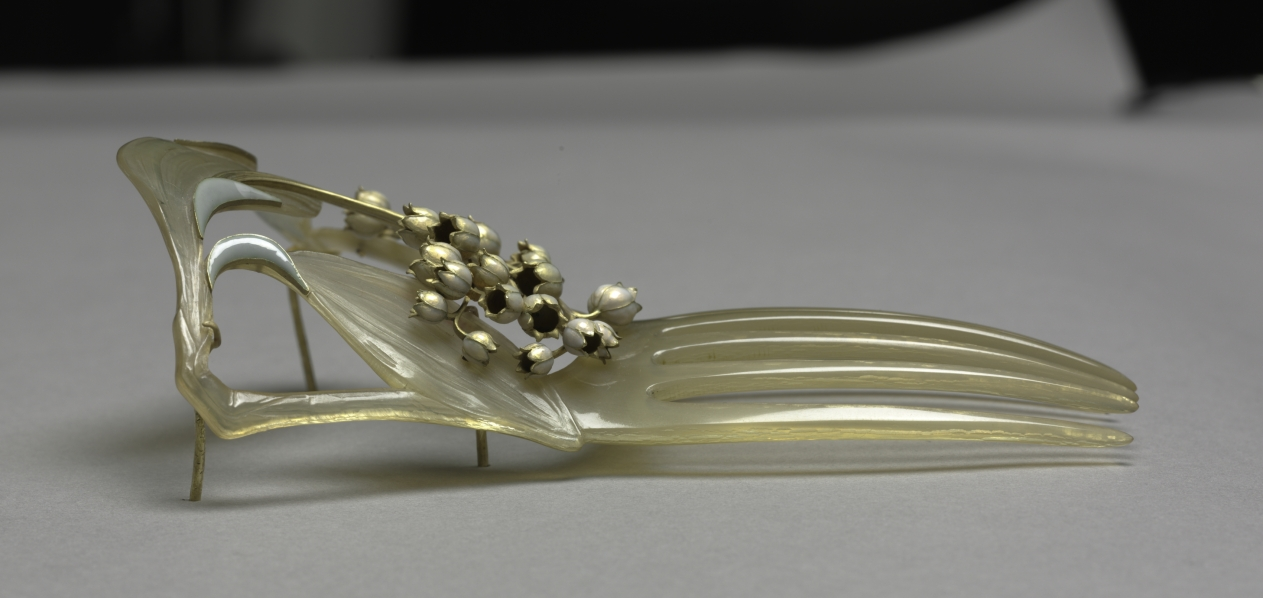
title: Lily of the Valley Comb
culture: France, early 20th Century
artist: René Lalique (French, 1860–1945)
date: c. 1900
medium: horn, enamel and gold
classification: Jewelry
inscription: Engraved on side of gold stem: "LALIQUE"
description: This comb was purchased by Cleveland native Jeptha Homer Wade II from Lalique after admiring the designer's work at the 1900 Exposition Universelle in Paris, probably for his wife Ellen Garretson Wade. Pearlescent horn forms the leaves of the lily of the valley, out of which the delicate, bell-shaped enamel flowers emerge.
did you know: Lalique valued the use of horn for its transparent qualities and natural color.